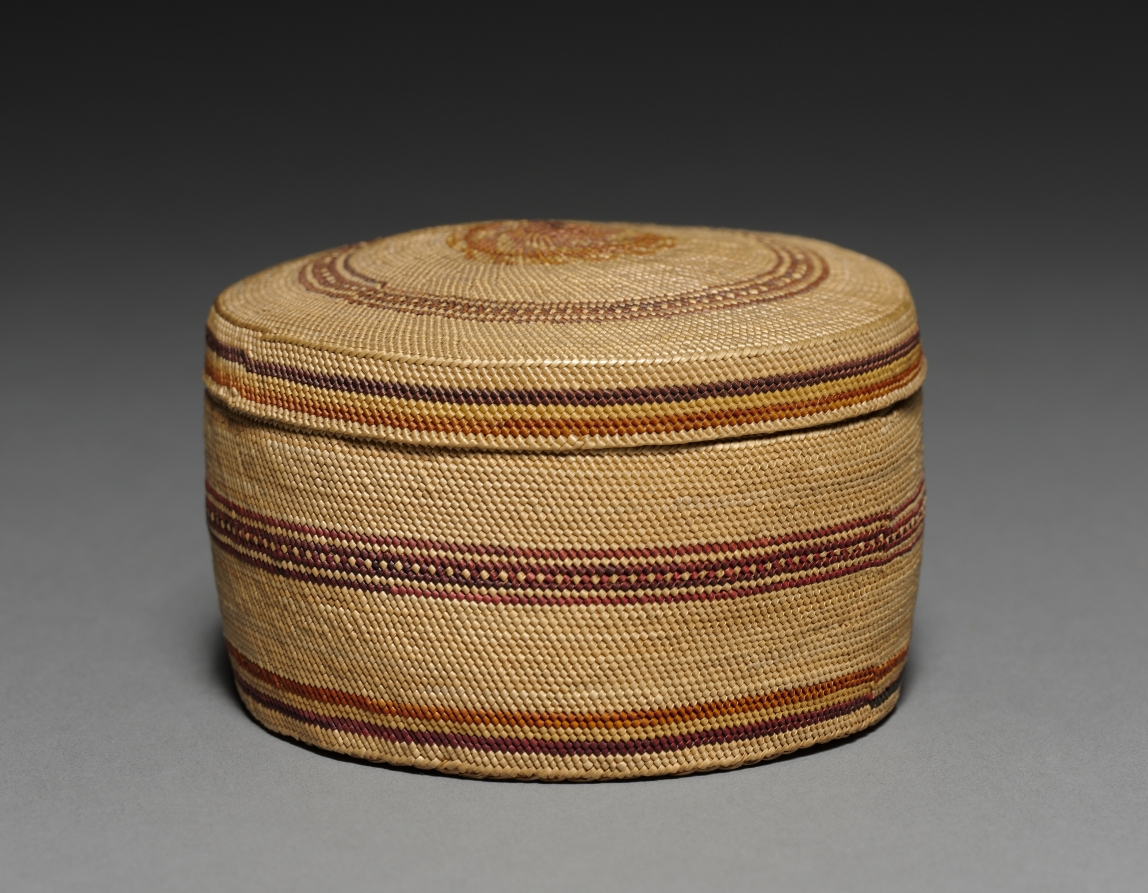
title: Lidded Bowl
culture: Northwest Coast, Makah, late 19th century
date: c 1900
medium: Cedar bark, deer grass; wrapped twining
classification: Basketry